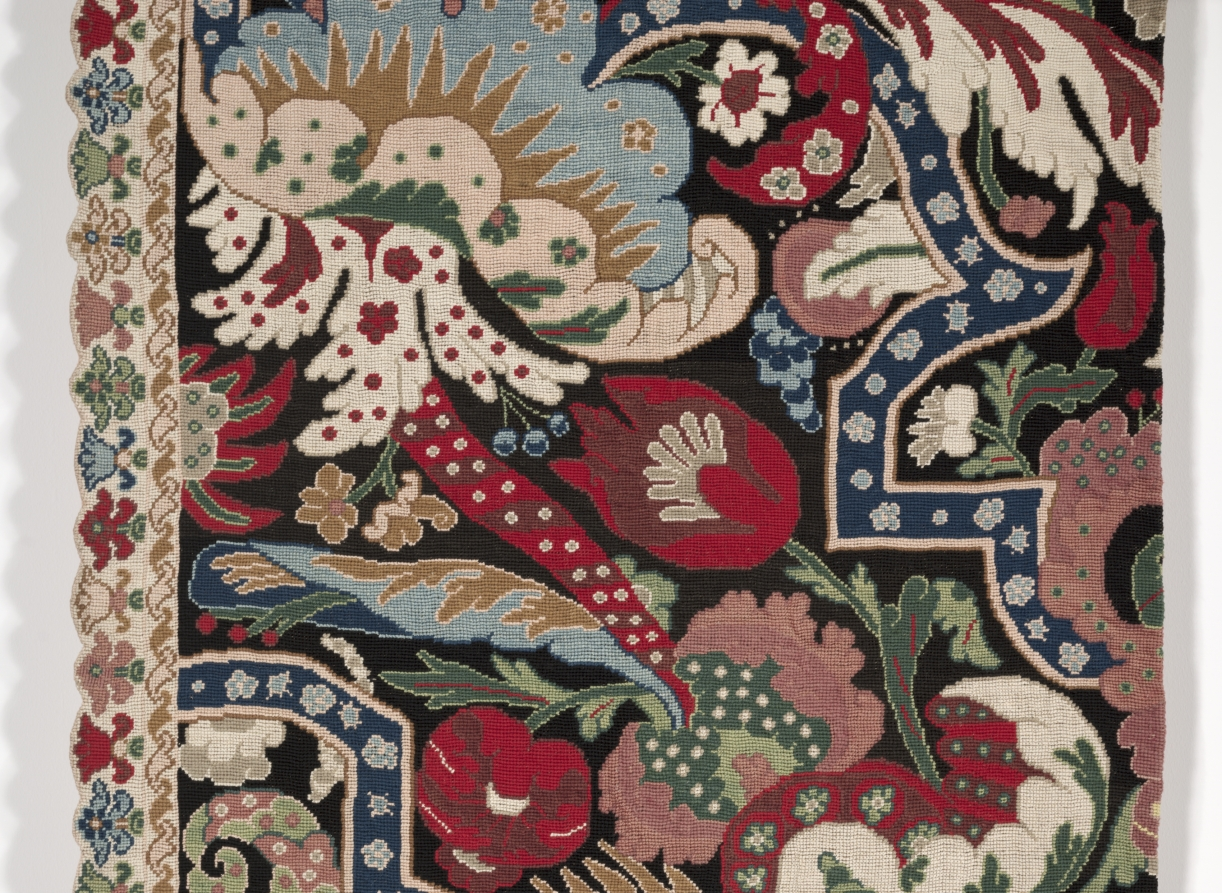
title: Needlework Bed Hanging in the Bizarre style (left half)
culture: France, 18th century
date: 1710–20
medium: Silk, wool; needlework, tent, and cross-stitch embroidery on canvas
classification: Embroidery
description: This panel is one of a pair that would have hung originally around a bed post as part of a full set of hangings on a bedstead in the early 1700s. Elaborate textile hangings were a conspicuous display of wealth since many ladies received their friends within their bedchamber. A full set enveloped the entire bedstead and, when closed, helped retain warmth long after the fire had gone out. This particular pair of panels is remarkable in that they represent many hours of highly skilled needlework. Their design is known as a "bizarre" pattern, which mimicked woven silks of the same era that were asymmetrical, boldly stylized adaptations of Asian fabrics that were coming into the European market from the trading routes at the time.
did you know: The design of this needlework panel is known as a "bizarre" pattern.